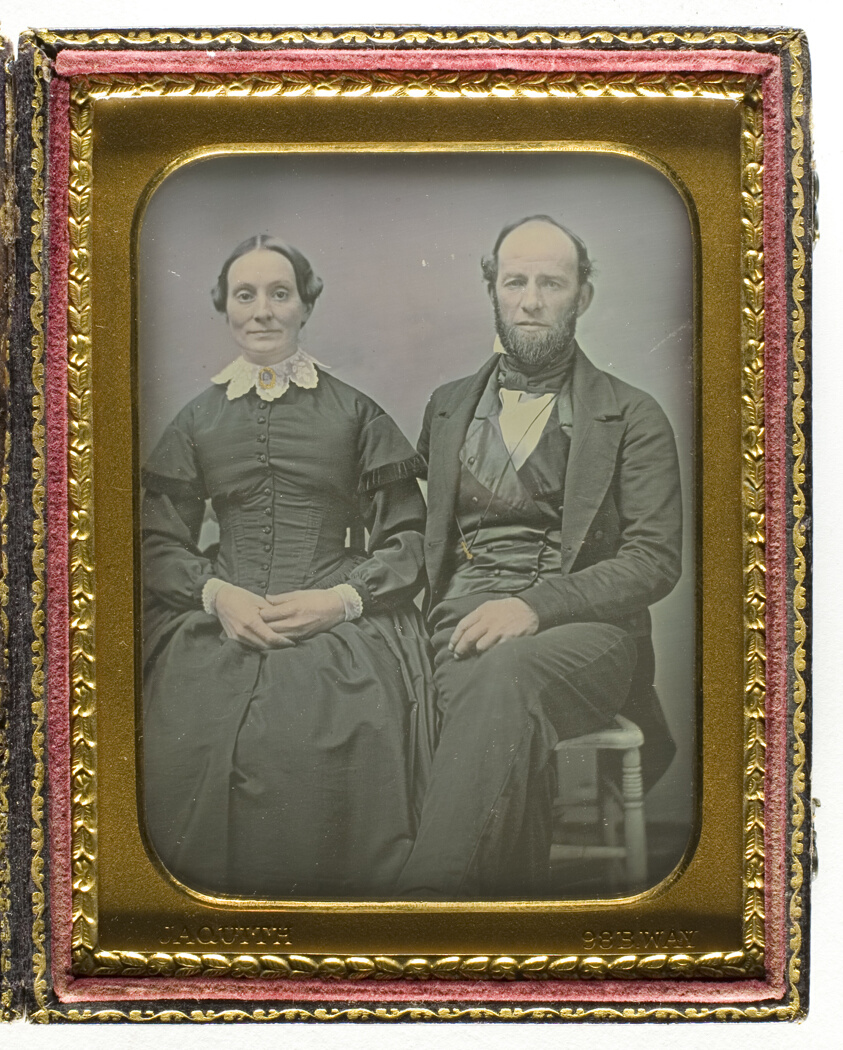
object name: Photograph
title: Phoebe Matthews and Captain Oliver Matthews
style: 19th century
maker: Nathanial Jaquith; American, 1834–1865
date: 1839/66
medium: Daguerreotype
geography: United States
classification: daguerreotype; photographic process; photography; photograph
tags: Collected by Hugh Edwards